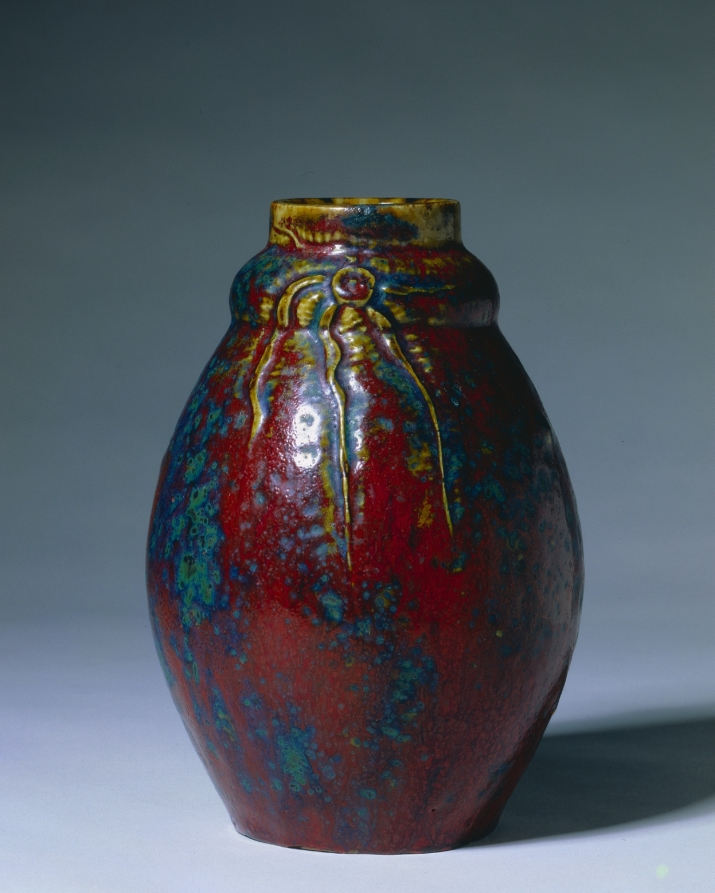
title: Vase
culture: America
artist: Pierre Adrien Dalpayrat (French, 1844–1910)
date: c.1900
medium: stoneware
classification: Ceramic